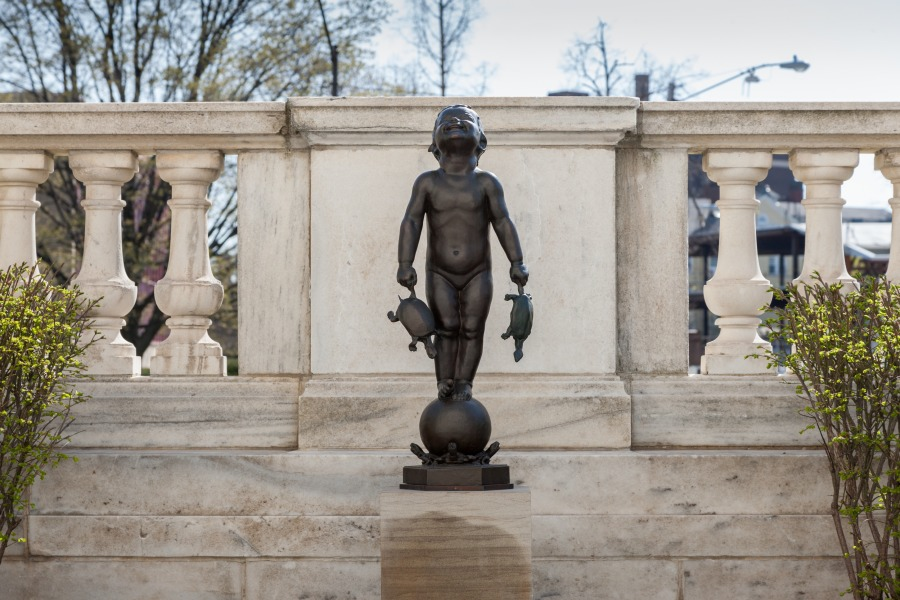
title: Turtle Baby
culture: America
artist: Edith Barretto Stevens Parsons (American, 1878–1956)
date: c. 1910–16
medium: bronze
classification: Sculpture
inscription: Signed on base: E. BARRETTO PARSONS COPYRIGHT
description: Parsons achieved renown through her garden sculptures of young children accompanied by animals, which one commentator praised for capturing “the happiness of just being alive.” In Turtle Baby, her most famous composition, the figure of the girl was modeled after her daughter. Conceived as a fountain, the sculpture has internal water conduits exiting the mouths of the four turtles circling its base.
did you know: Parsons created similar sculptures featuring young girls and boys with ducks, frogs, and fish.